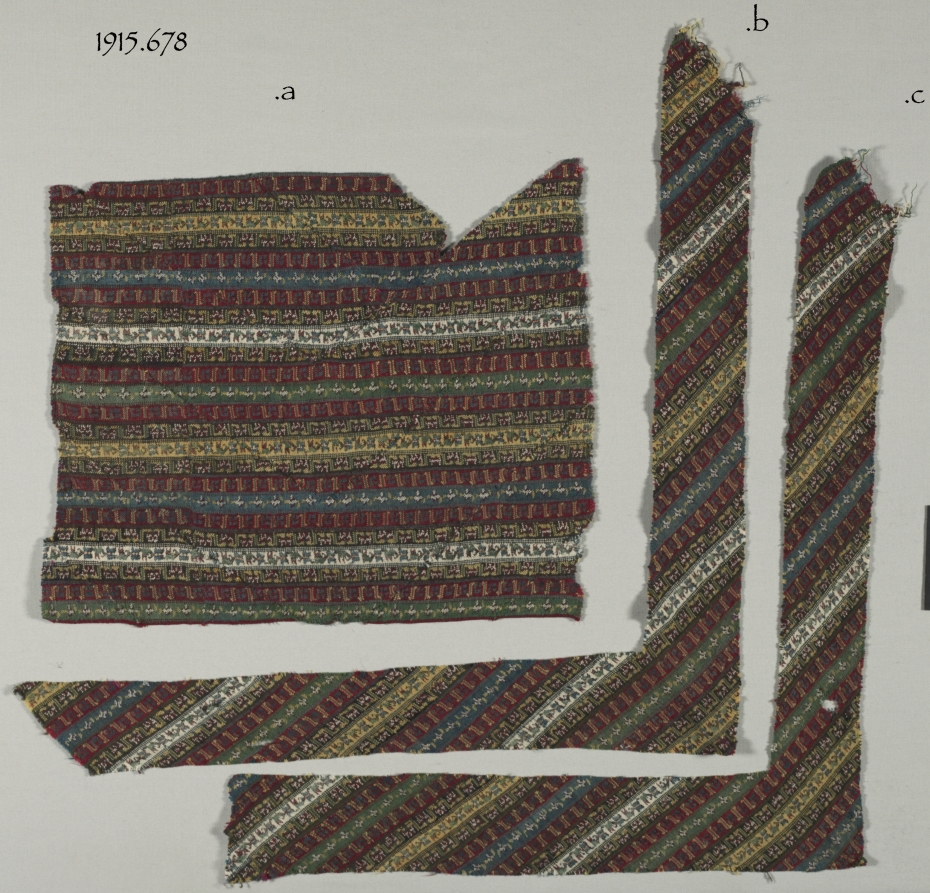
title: Fragments of a Shawl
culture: India, Kashmir, 19th century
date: 19th century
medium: twill weave, brocaded; wool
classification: Textile